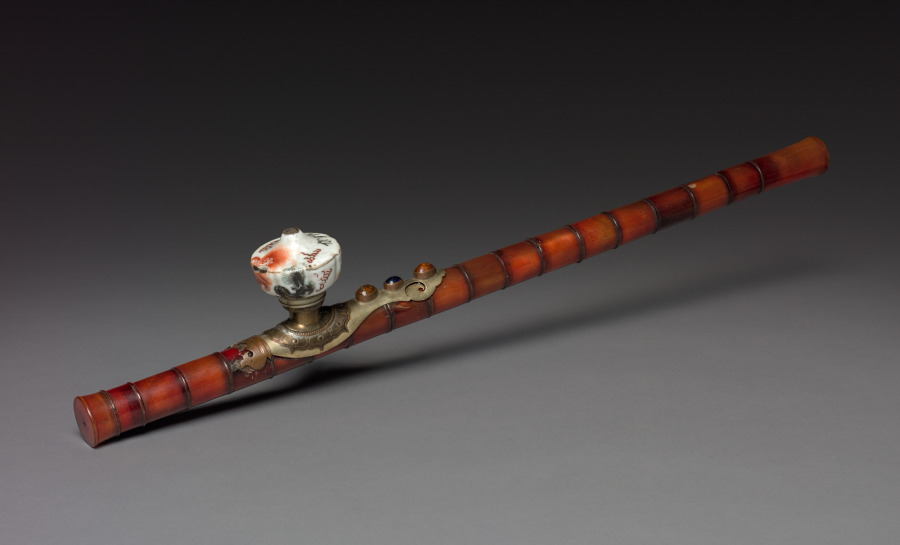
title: Opium Pipe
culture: China, Qing dynasty (1644-1911)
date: 1800s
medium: horn (?) with silver decoration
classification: Miscellaneous